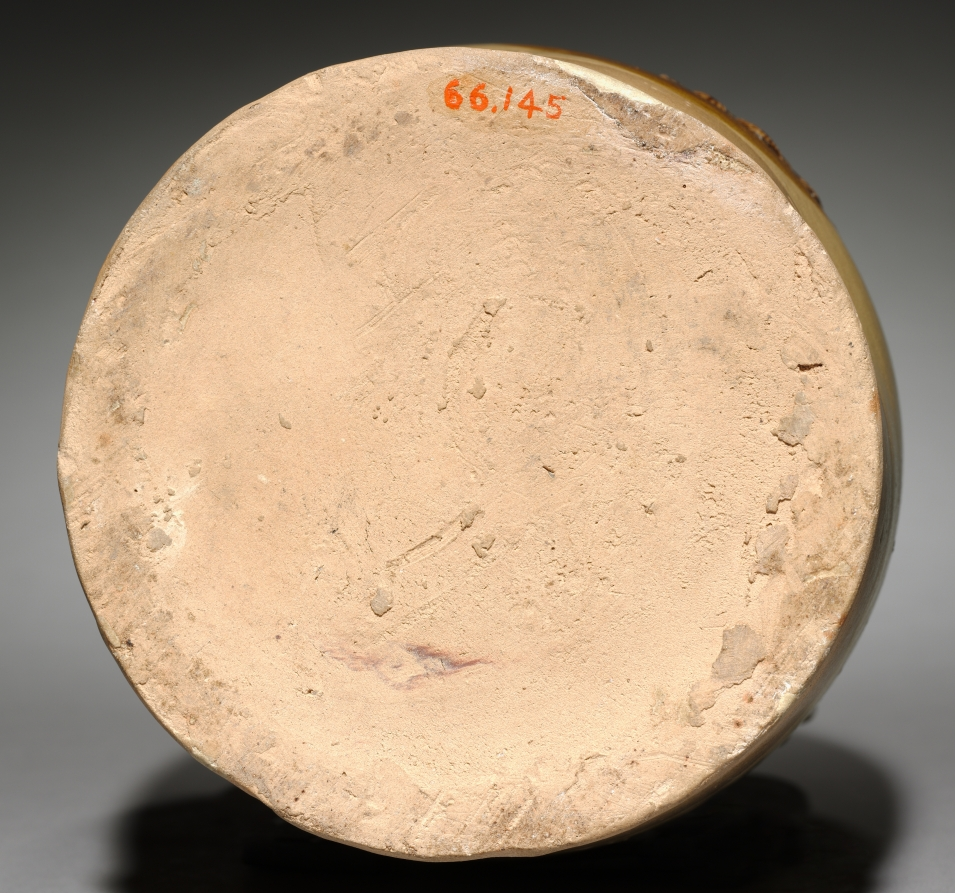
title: Ewer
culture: China, Hunan province, Tongguan, Tang dynasty (618–907)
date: 800s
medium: glazed stoneware with molded and applied decoration, Changsha ware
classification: Ceramic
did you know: Molded clay medallions with a stylized double-bird-and-leaf pattern were applied below the two side loops and the spout.